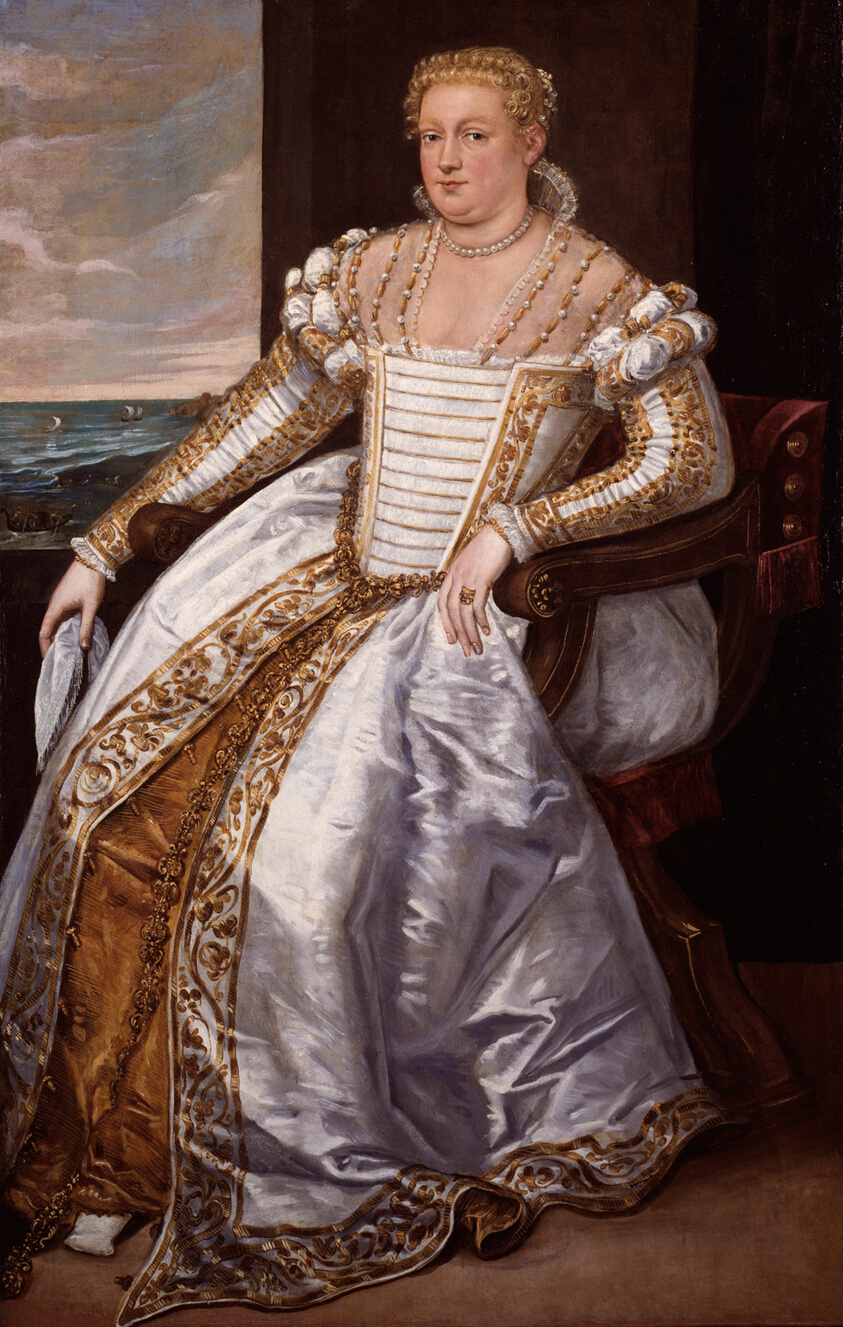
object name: Painting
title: Portrait of a Lady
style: 16th Century, sixteenth century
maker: Attributed to Giovanni Antonio Fasolo (Italian, 1530–1572)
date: c. 1565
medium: Oil on canvas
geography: Italy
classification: oil on canvas; Italian; oil paintings (visual works); paint; portrait; painting; european painting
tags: portraits: female subject, Italy, gold (color), white (color), boats, chair, ocean, wealth, luxury, jewelry, pearls, water, woman, portrait, portraits